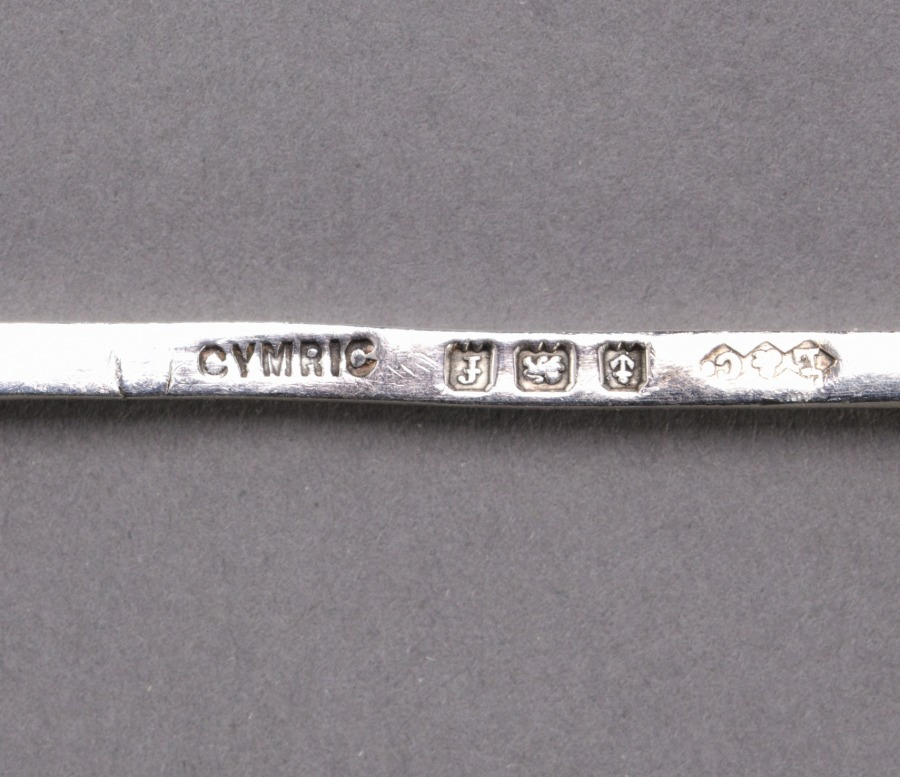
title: Set of six Coffee Spoons in Original Wooden Case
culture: England, London, 19th century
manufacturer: Liberty and Company (British)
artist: attributed to Oliver Baker (British, 1856–1939)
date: 1905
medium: Silver, turquoise, wooden box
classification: Silver